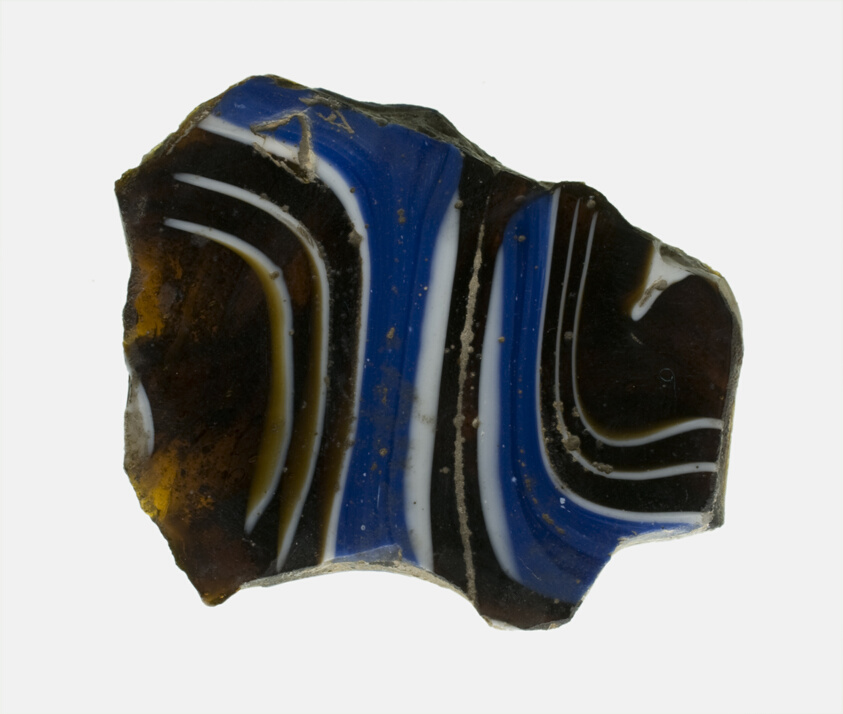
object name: Decorative Arts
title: Fragment of a Bowl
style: roman (ancient, style or period), ancient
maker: Roman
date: 1st century BCE–1st century CE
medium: Glass, mosaic glass technique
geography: Roman Empire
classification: fragment; decorative arts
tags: decoration